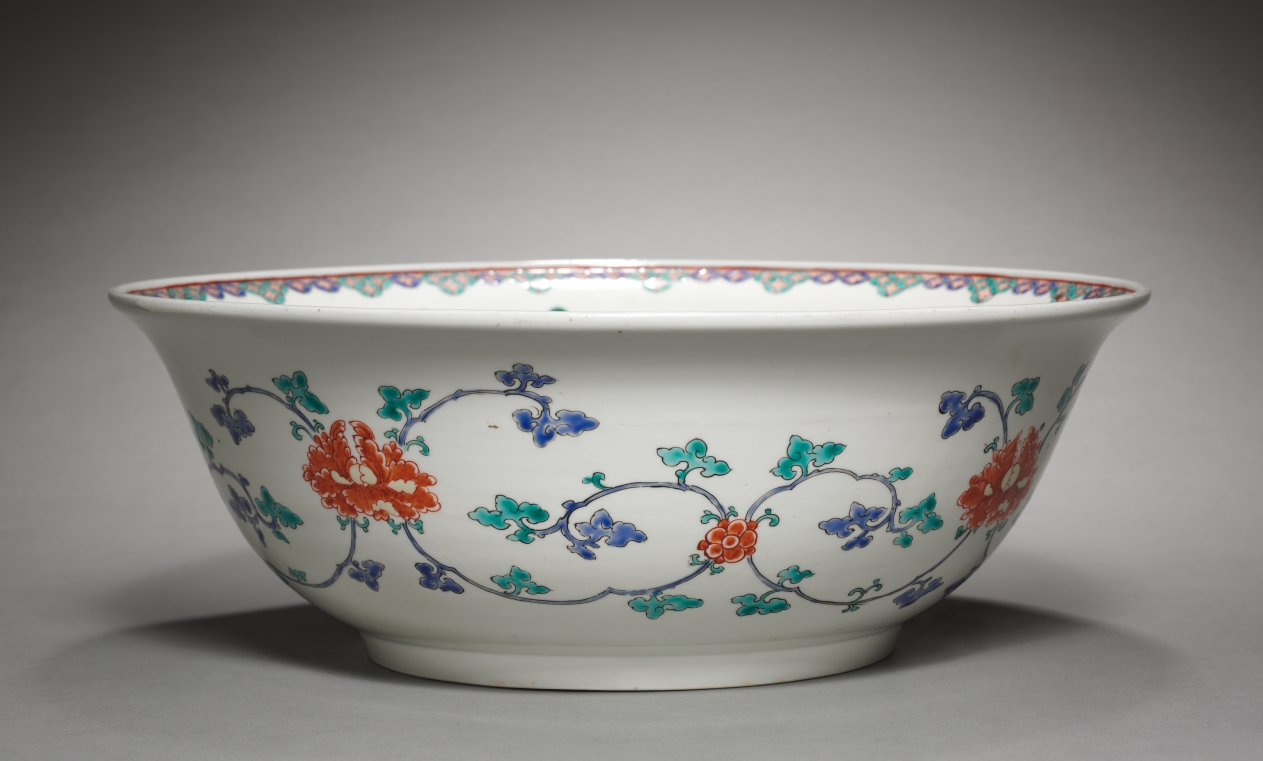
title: Bowl: Kakiemon Ware (2 of 2)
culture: Japan, Edo period (1615–1868)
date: late 1600s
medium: porcelain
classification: Ceramic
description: The Chinese style of decoration identifies this bowl as a product made for the markets in England, Holland, France, and Germany. Here, kakiemon potters rearranged the Chinese literati motifs of the plum, pine, and bamboo. Such kakiemon ware inspired domestic porcelain production in Europe in the 18th and 19th centuries.